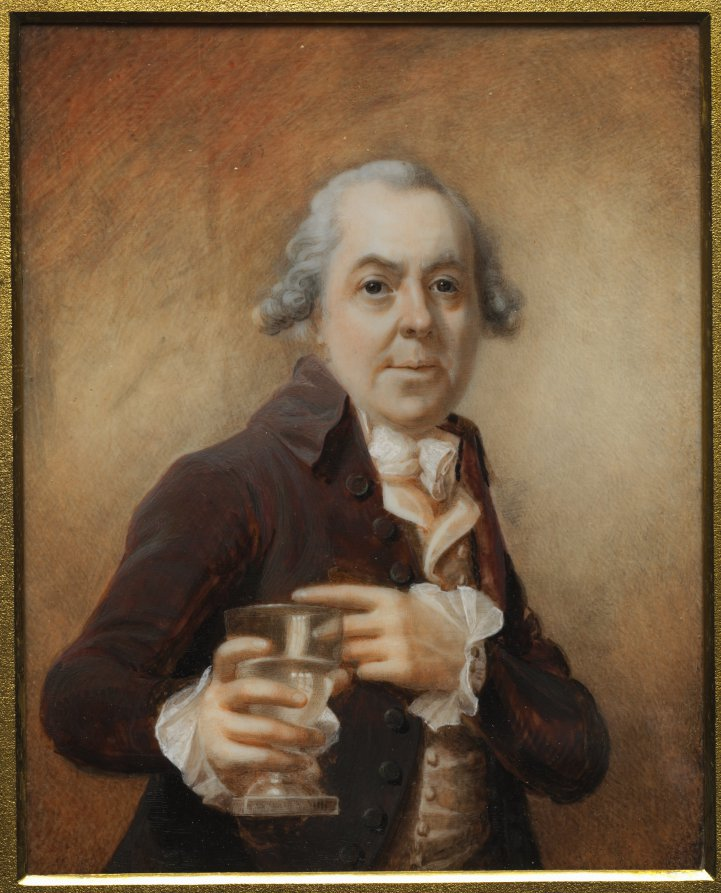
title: Portrait of a Man Holding a Glass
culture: England, late 18th century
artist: Joseph Daniel (British, c. 1760–1803)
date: c. 1780s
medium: watercolor on ivory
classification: Portrait Miniature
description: Joseph Daniel was the son Nochaniah Daniel of Bridgewater, Somerset, and among the first known Jewish artists of South West England. Joseph’s work has often been confused with that of his brother Abraham, with whom he competed for patronage. Neither commonly used his forename in signature nor in advertisement, possibly with a view to capitalize on the other’s clientele. Little is known about the brothers’ education apart from the fact that they were trained by their mother. Joseph seldom exhibited his miniatures in public. Only in recent years has there been an increased confidence in distinguishing his works from those of Abraham, resulting from the discovery of a handful of miniatures signed with first initials. The primary distinction between their styles is usually cited as Joseph’s greater attention to detail and his use of gray tones in shading. This outstanding miniature dating from the 1780s is unsigned, as was typical of Daniel’s practice. The sitter is conventionally dressed, wearing a powdered wig and a cream-colored cravat and waistcoat under a dark brown frock coat against which the delicacy of the translucent frilled cuffs is especially pronounced. There is evidence on the painted surface that Daniel adjusted the position of the index finger on the man’s left hand as well as the rightmost curls of his wig. The background is a mottled rusty brown, spot lit to pale brown in the center. The pallor of the sitter’s face, framed by gray hair and a blanched background, reinforces the intensity of his dark eyes, which confront the viewer directly. The face is sensitively described with broad gray shadows. Daniel’s attention to detail is evident in the reflection of the window in the curved glass of the goblet. The goblet, while acting as a central element in the picture, is not a refined object; instead, it is a heavy, plain vessel significant for its contents: water from Bath’s natural hot springs. This type of virtuoso portrait may have been displayed in the artist’s studio to attract clients and refers to the spa culture of Bath, a critical site for social maneuvering in eighteenth- and early-nineteenth-century England.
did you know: While some highly successful artists were able to support themselves by working only in miniature, it was more common for them to work in a variety of media like Joseph Daniel who was a miniature painter, engraver, and jeweler who also executed pictures in oil, crayon, and hairwork.